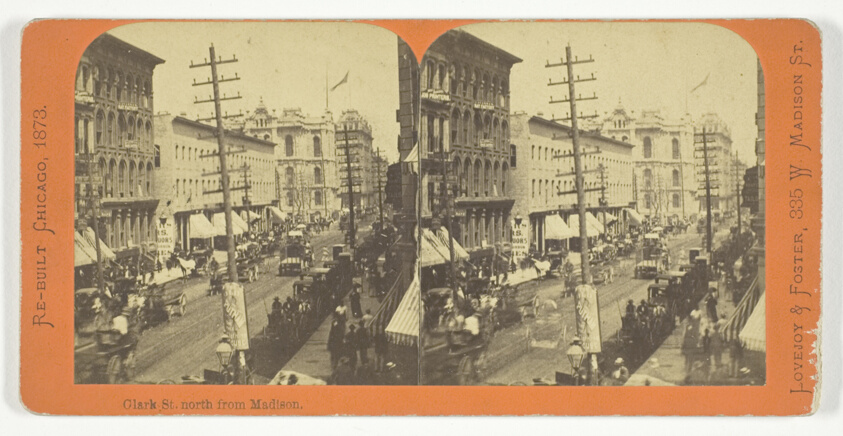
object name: Photograph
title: Clark Street, North from Madison, from the series "Re-Built Chicago"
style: 19th century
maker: Lovejoy & Foster; American, active 1870s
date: 1873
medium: Toned gelatin silver print, stereo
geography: United States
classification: photograph; photography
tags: Chicago